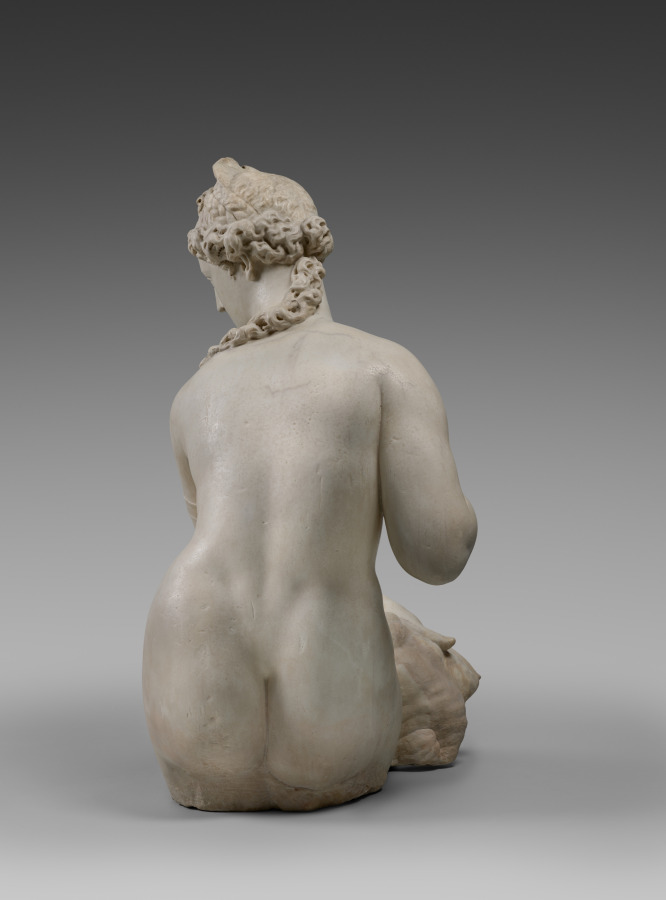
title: Fata Morgana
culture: Italy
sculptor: Giambologna (Flemish, active Italy, 1529–1608)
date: c. 1572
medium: Marble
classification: Sculpture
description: Commissioned by prominent banker Bernardo Vecchietti, whose surname means “old,” Fata Morgana took the name both of the nearby spring that fed the fountain she surmounted, and the legendary fairy who restored King Arthur’s youth. The Fata Morgana is one of only around a dozen sculptures in marble by Giambologna. The artist’s favorite subject was the female nude because of its capacity to showcase his extraordinary ability to model softness in hard stone and to convey dynamic movement. Her twisting pose invites the viewer to appreciate the Fata Morgana from every angle.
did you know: The sculpture originally appeared to emerge mysteriously from a cave within a constructed grotto.